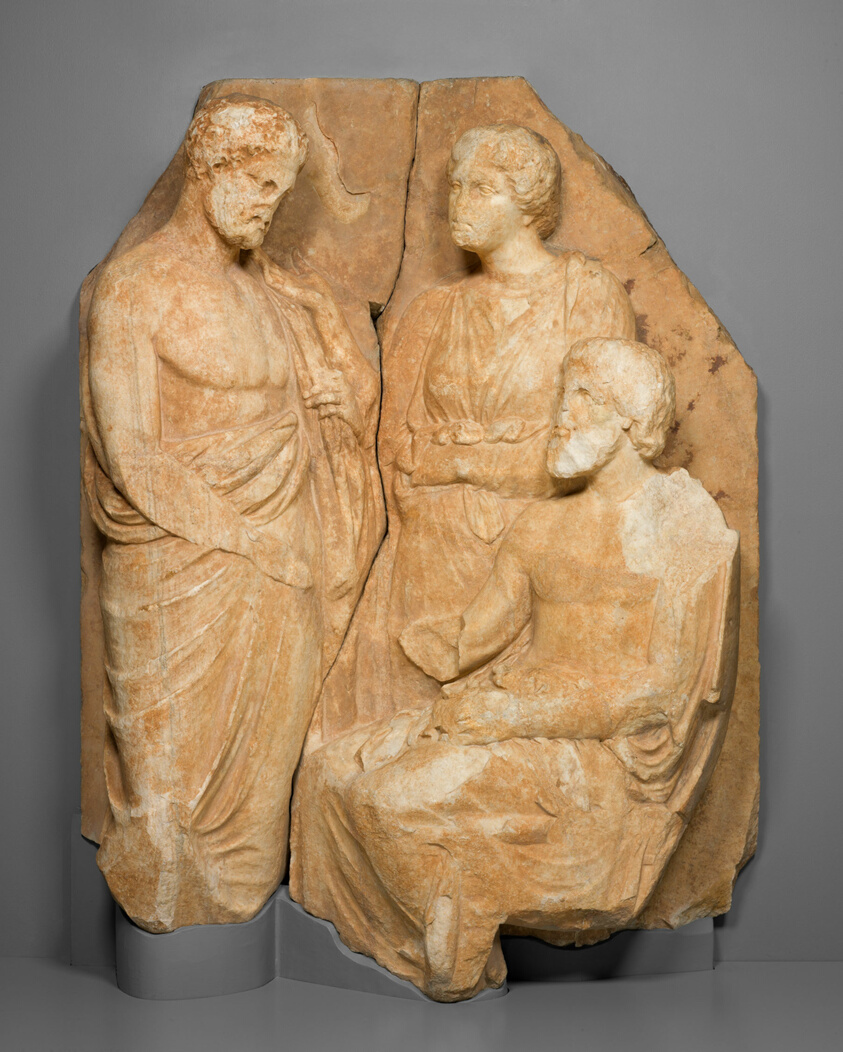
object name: Funerary Object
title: Fragment of a Funerary Naiskos (Monument in the Shape of a Temple)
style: late classical, Classical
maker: Greek; Athens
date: about 330 BCE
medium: Marble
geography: Athens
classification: architectural fragment; marble; stone; sculpture; ancient art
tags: funerary art, death, funerals, families